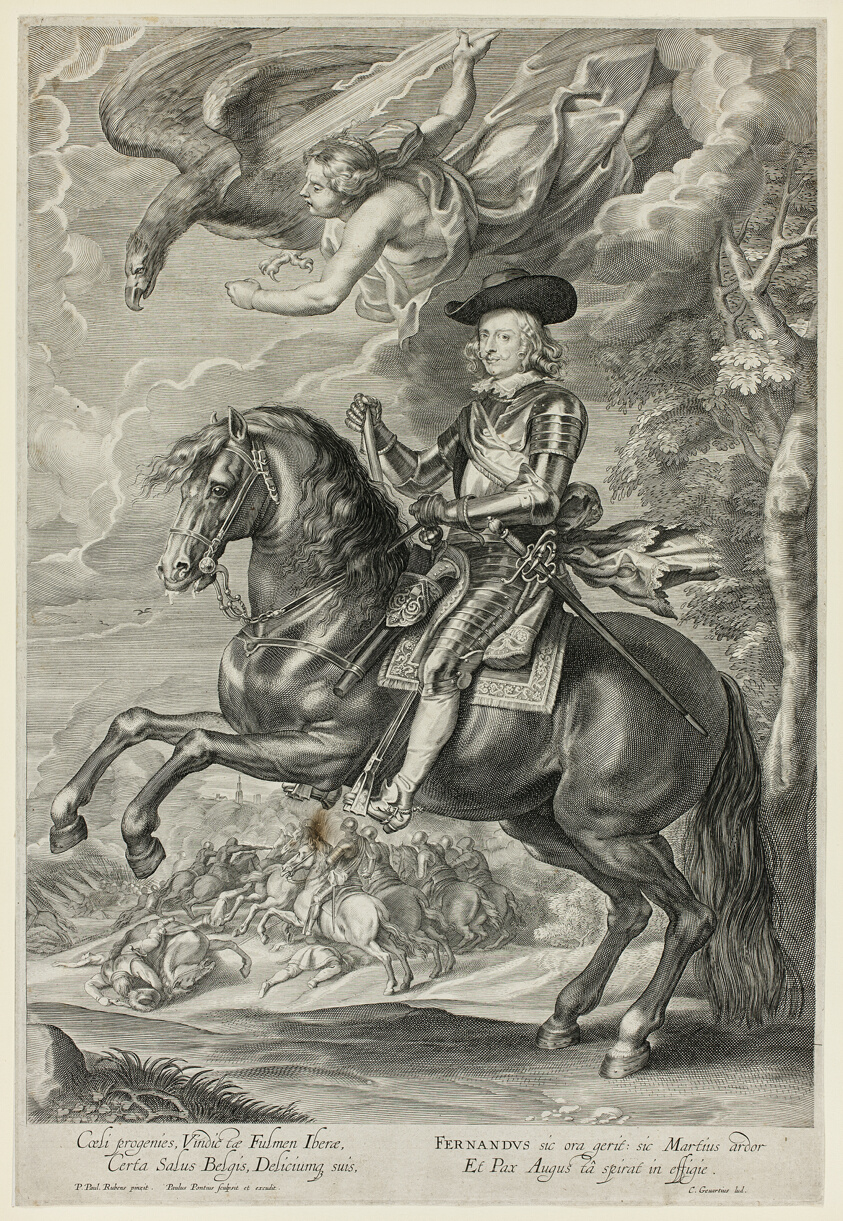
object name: Print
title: Ferdinand of Austria on Horseback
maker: Paulus Pontius (Flemish, 1603–1658); after Peter Paul Rubens (Flemish, 1577–1640)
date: c. 1641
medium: Engraving in black on ivory laid paper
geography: Flanders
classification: engraving; paper; print; prints and drawing